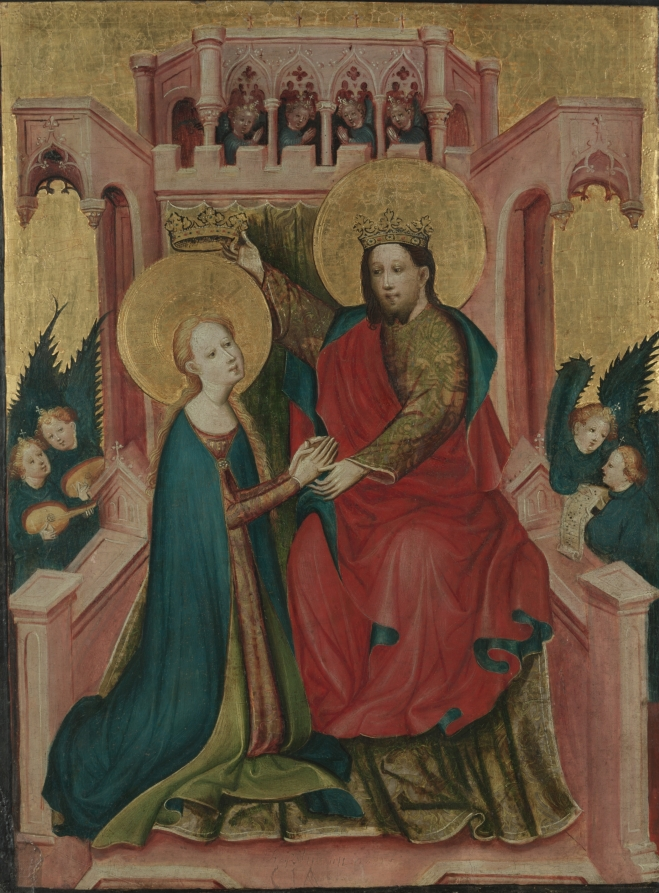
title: Coronation of the Virgin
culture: Germany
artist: Master of the Fröndenberg Altarpiece (German)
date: c. 1410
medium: tempera and gold on wood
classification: Painting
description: This panel once formed the left wing of an altarpiece originally located in a Cistercian convent in the German town of Fröndenberg. The Coronation of the Virgin was a common subject; though it is not based on a biblical text it often appeared in medieval books of hours as a focus of contemplation. It represents the culminating event in the life of Mary. Here, Christ and the Virgin are housed in an architectural setting; the Virgin kneels before Christ as he crowns her in the company of a group of angels. The color palette is particularly rich: pink, deep red, blue, and a delicate green as well as large areas of gold leaf. The well-developed, proportional figures, modeled drapery, and detailed architectural throne suggest an artist with a high level of experience and sophistication.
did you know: This is only one panel from what would have been a large altarpiece dedicated to the Virgin.